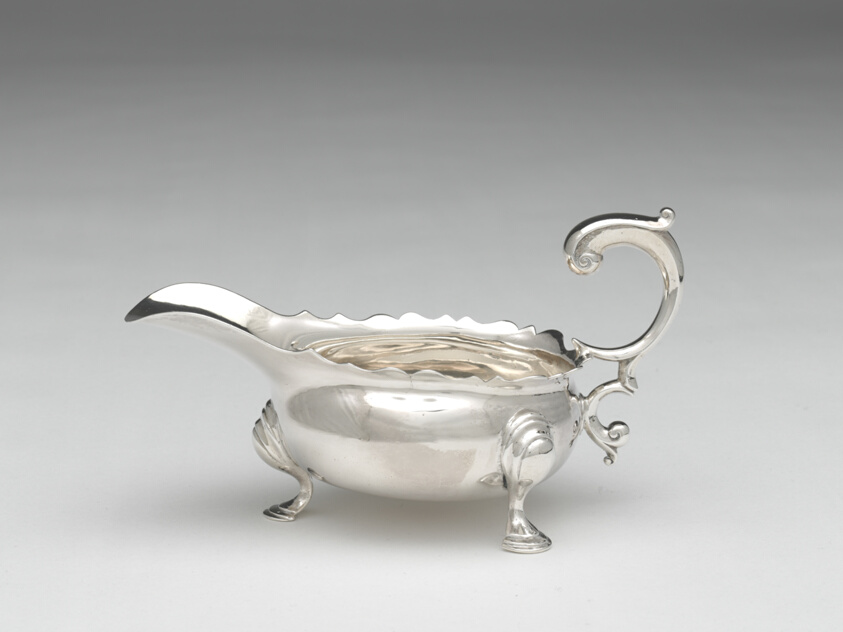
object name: Metalwork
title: Sauce Boat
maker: Jacob Hurd; American, 1702/03–1758; Boston, Masssachusetts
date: c. 1745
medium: Silver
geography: Boston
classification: vessel for serving food; sauceboat; silver; american decorative arts; american arts; decorative arts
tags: dining, drinking